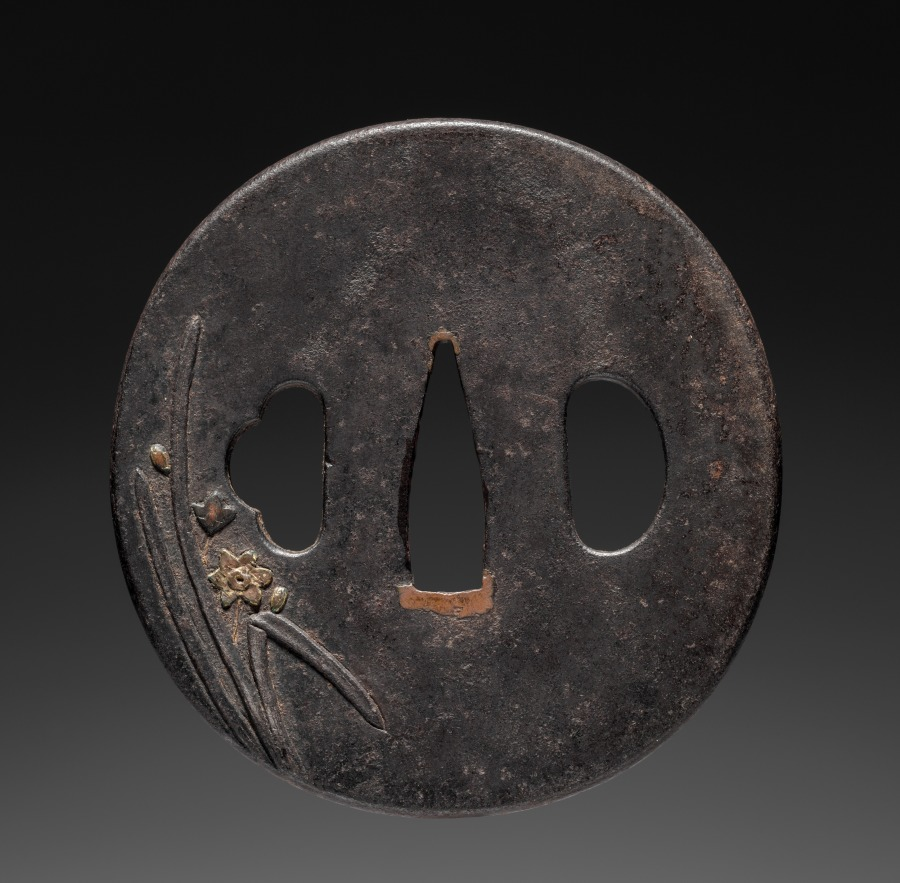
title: Sword Guard (Tsuba)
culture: Japan, possibly Edo period (1615-1868)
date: c. 1615–1868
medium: iron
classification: Arms and Armor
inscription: 銘 江府住 辰壽